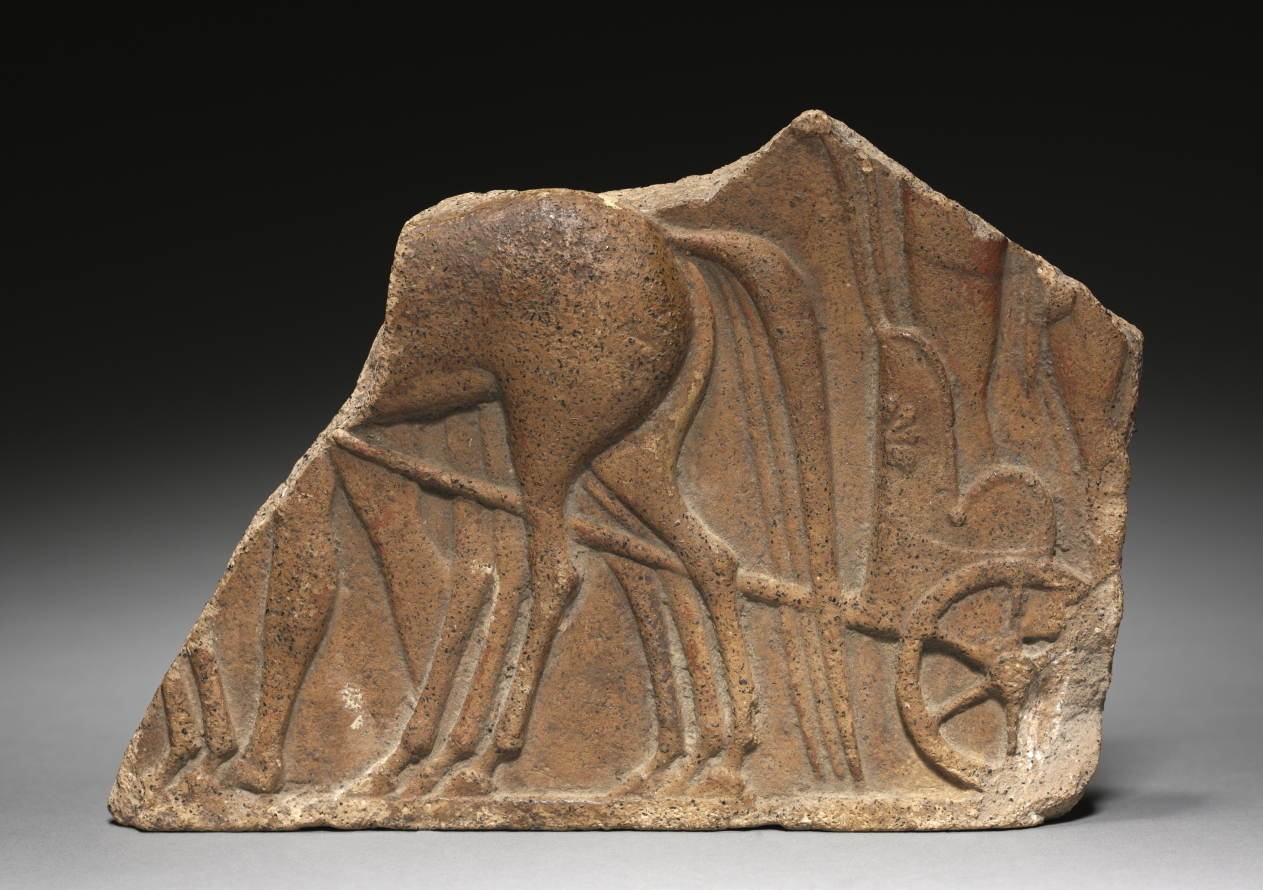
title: Plaque Fragment of Horses and Chariot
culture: Etruscan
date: 500–475 BCE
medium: terracotta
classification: Sculpture